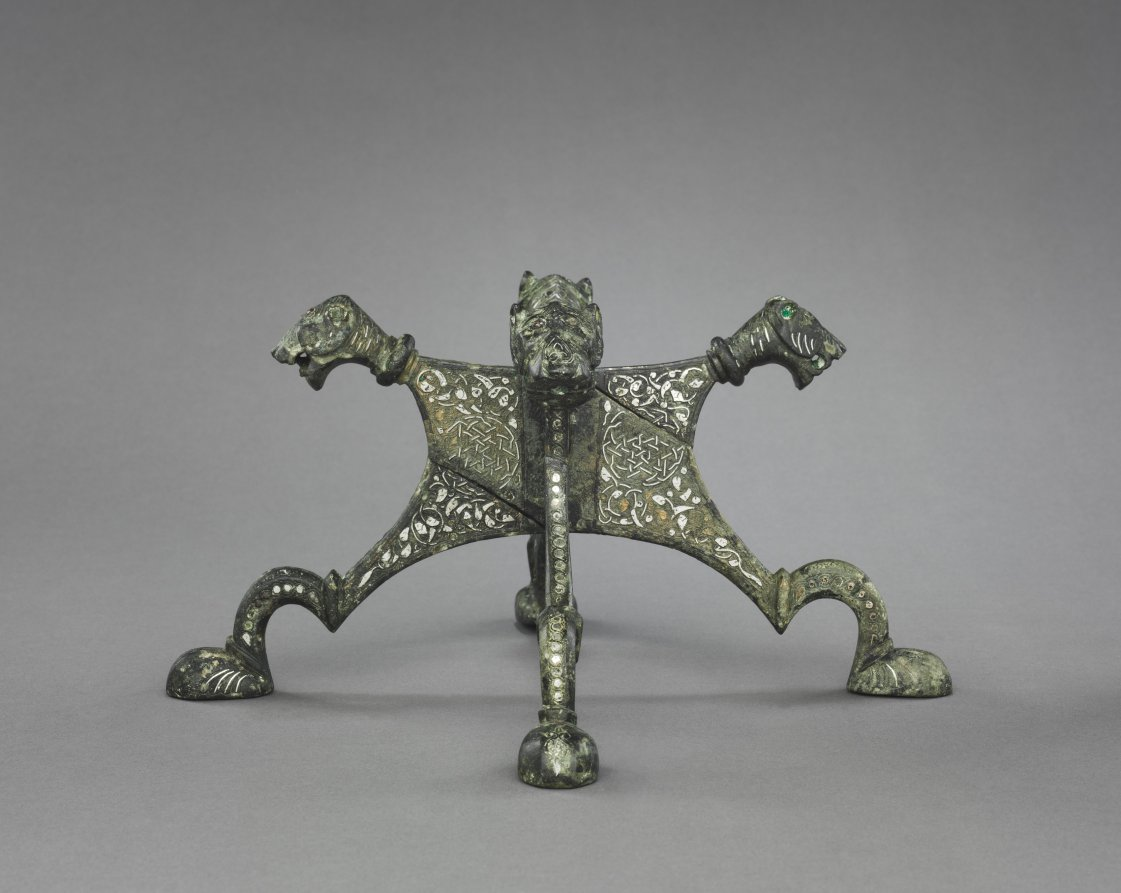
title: Lion-headed Stand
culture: Northern Iraq or Syria, Zengid or Ayyubid period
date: 1150–1220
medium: cast brass inlaid with silver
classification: Metalwork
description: The four sections of this stand each terminate in a lion's head and the supporting legs end with a paw. The angular modeling of the lion's head contrasts with the delicate silver inlaid decoration.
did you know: The bronze stand is embellished with silver inlay in both floral and geometric design.